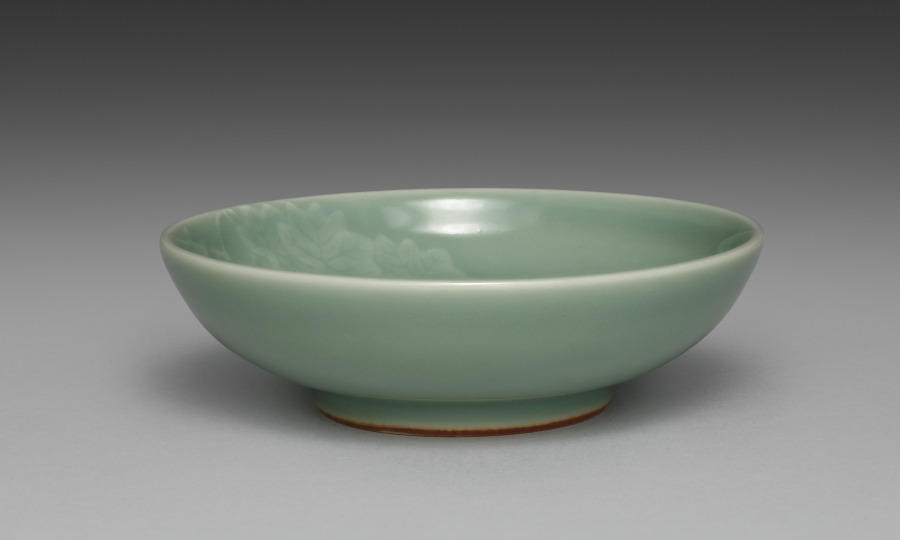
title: Dish from Dishes with Ivy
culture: Japan, Meiji period (1868–1912)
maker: Seifū Yohei III (Japanese, 1851–1914)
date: 1893–1914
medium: One from a set of five dishes; porcelain with green glaze and molded designs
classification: Ceramic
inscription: 清風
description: Yohei III’s main output for his sophisticated clientele was in the form of tea sets and dining sets. He often produced in pairs, sets of five, or sets of ten. This set of five dishes with a green glaze and designs of ivy vines in very low relief has unfortunately lost its box. These dishes are slightly larger than the other dishes, like CMA 2022.187, and so may have been not saucers but rather small plates for meals.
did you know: In his career, Seifū Yohei III created a range of dishes in green glazes.